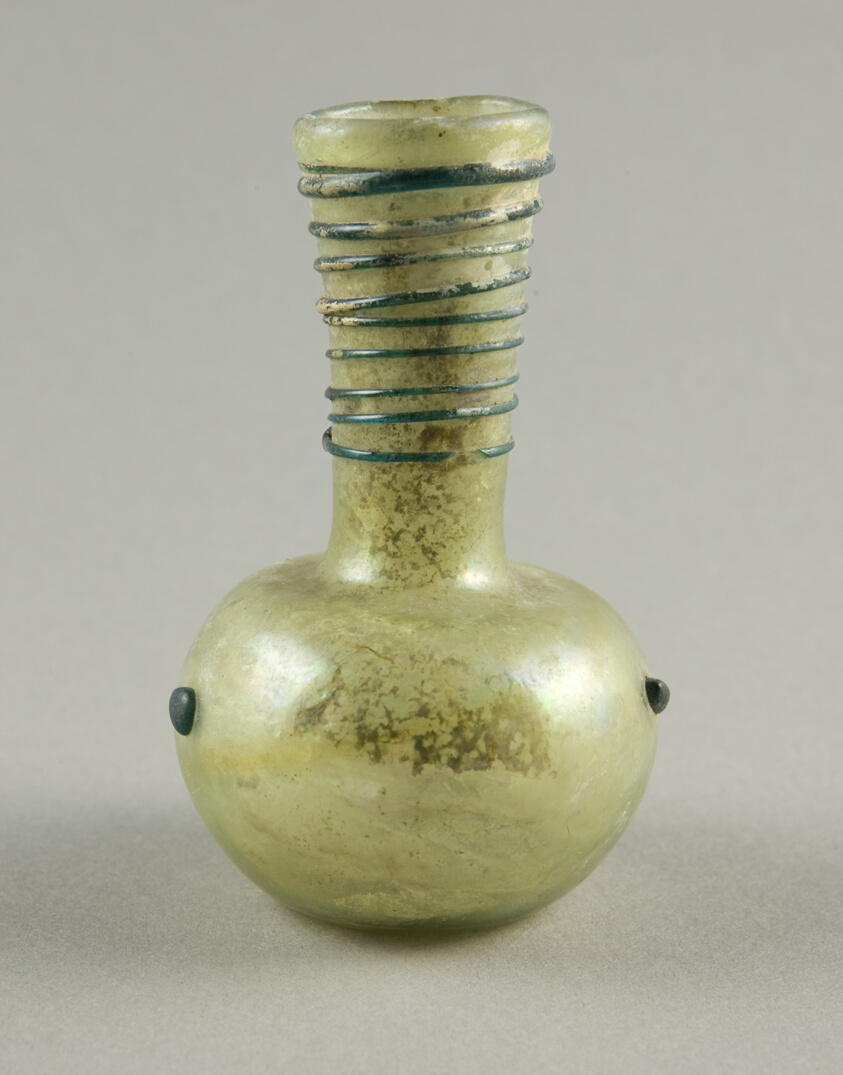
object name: Vessel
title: Flask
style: palestinian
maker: Ancient Mediterranean; Levant or Palestine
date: 5th-6th century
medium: Glass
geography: Palestine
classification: glass; vessel; ancient art